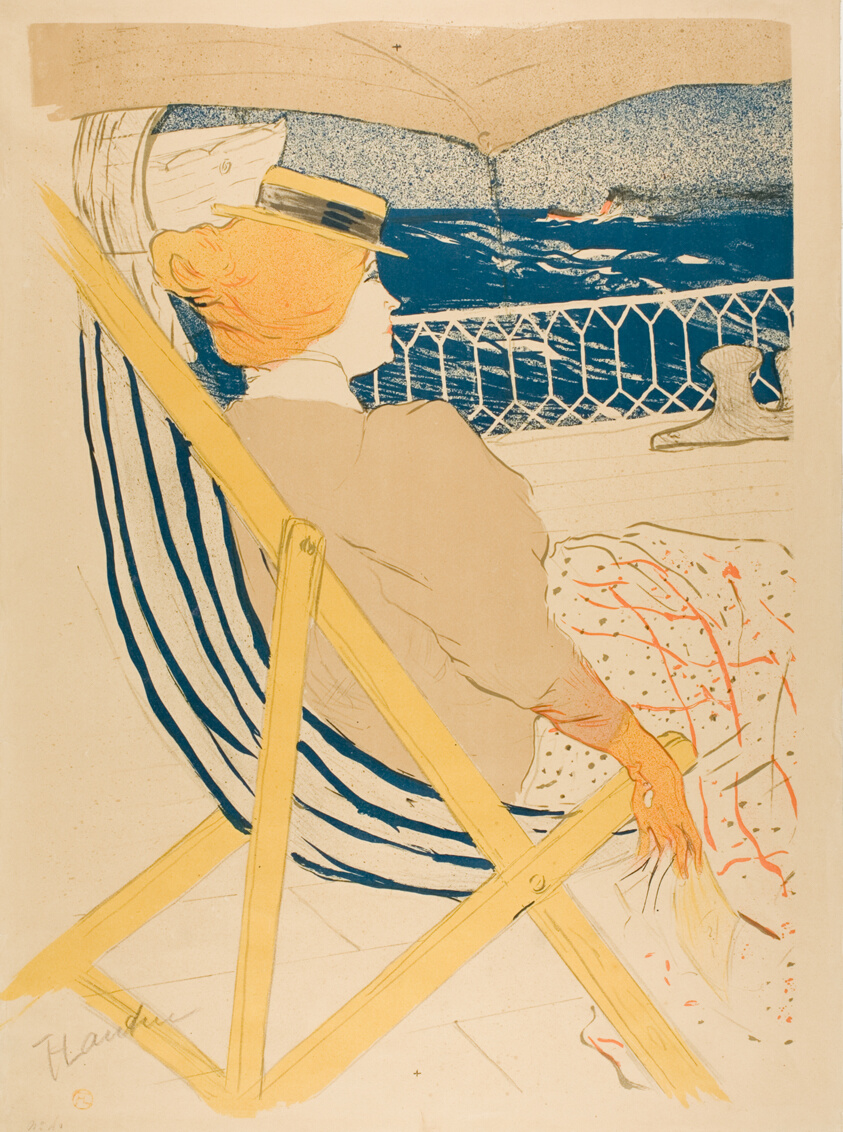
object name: Print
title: The Passenger in Cabin 54—Cruise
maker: Henri de Toulouse-Lautrec (French, 1864-1901)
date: 1896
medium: Color lithograph on tan wove paper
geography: France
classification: lithograph; print; prints and drawing